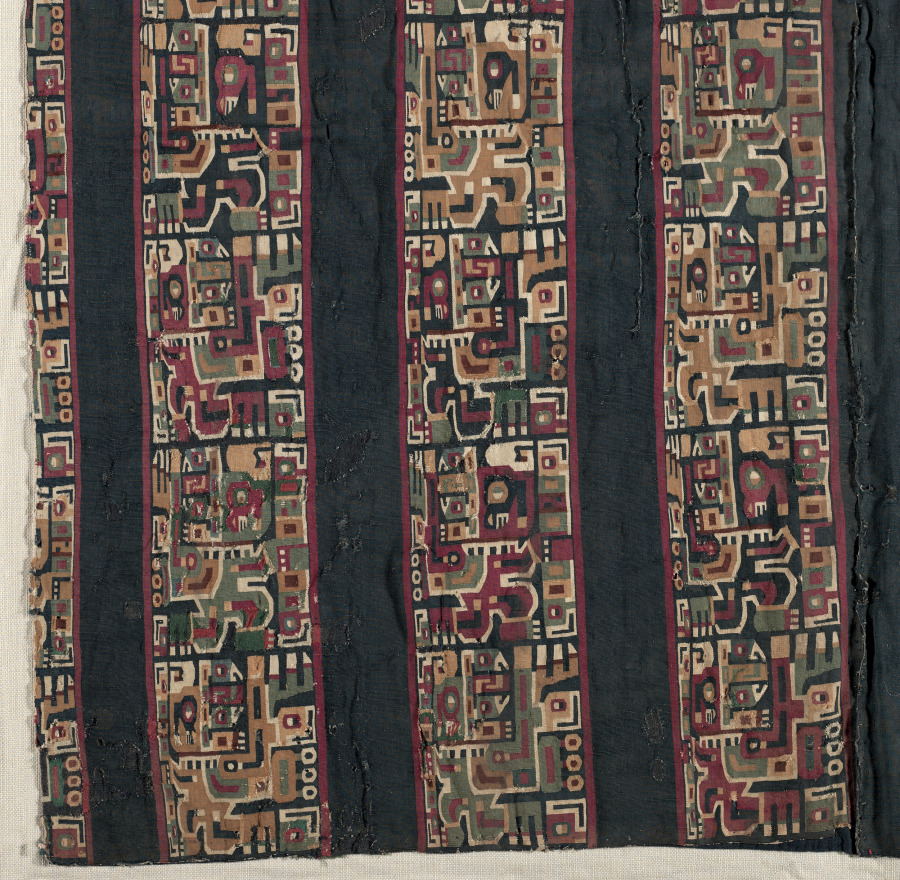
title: Half of a Sleeved Tunic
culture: Central Andes, Middle Horizon, Wari, 6th-11th century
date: c. 500–1000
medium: single-interlocked tapestry; cotton warp; camelid fiber weft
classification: Textile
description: The bird-headed creature in profile that repeats in each of this tunic's design fields gazes upward, holds a staff of authority in front of its body, and wears an ornate headdress behind which a three-feathered wing can be seen. The extremely high technical quality of such tunics suggests that the Wari reserved bird imagery for their most exalted rulers. Here, the original incorporated more than twice as much yarn as the routine--some 19 miles, all handmade and much dyed an inky, dark blue, the most prestigious of Wari colors.